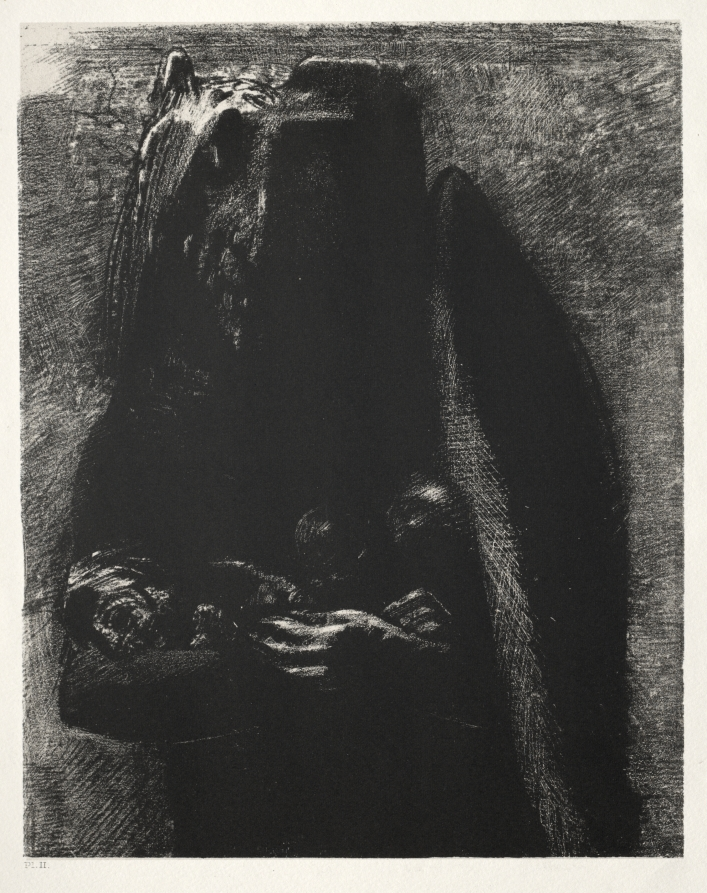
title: It Is the Devil, Bearing Beneath His Two Wings the Seven Deadly Sins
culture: France, 19th century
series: The Temptation of Saint Anthony (First Series)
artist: Odilon Redon (French, 1840–1916)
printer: Becquet (French)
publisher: Edmond Deman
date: 1888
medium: lithograph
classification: Print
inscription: printed at lower left, below image: Pl. II / C'est le diable, portant sous ses deux ailes les sept péchés capitaux.....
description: This portfolio is one of three made by Odilon Redon inspired by avant-garde writer Gustave Flaubert’s novel The Temptation of Saint Anthony (1874). Captivated by the book’s fantastical account of moralizing tests encountered by a hermit in the desert, Redon executed charcoal drawings and attempted to evoke that medium’s dense blackness in his lithographs. Based on the text’s darkly imaginative tone rather than its actual content, the works in this series present invented monsters and figures in otherworldly settings with jarring tonal variations. Although Redon felt that the prints effectively translated the surreal universe of his source material, they were largely misunderstood in his own time.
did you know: Publisher Edmond Deman commissioned this portfolio after he saw an 1886 exhibition of Redon's work in Brussels, Belgium.